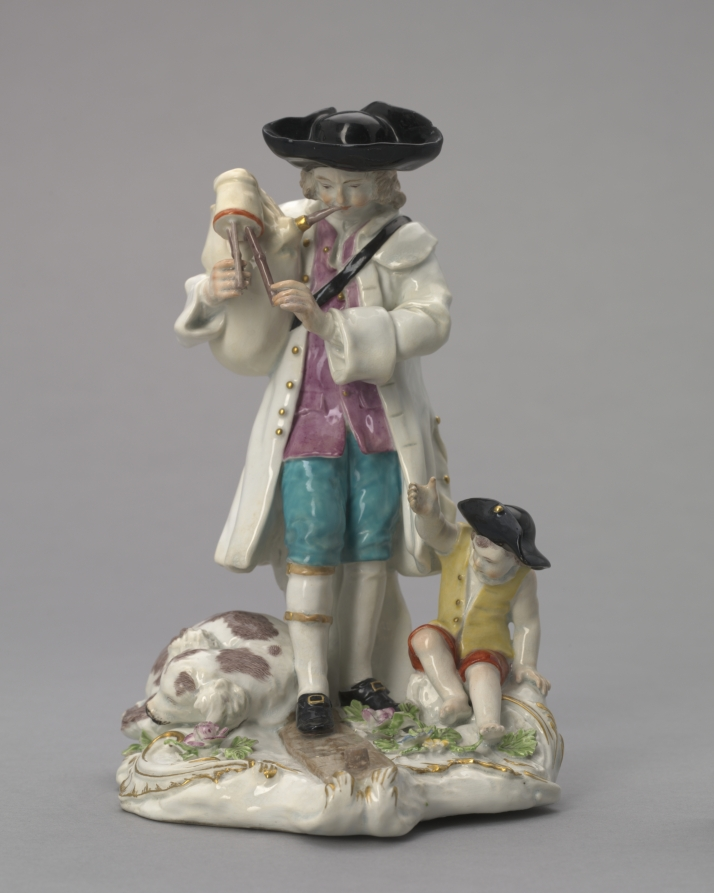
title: The Itinerant Musician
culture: England, Chelsea, 18th century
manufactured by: Chelsea Porcelain Factory (Britain, London, 1745–84)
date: c. 1756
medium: soft-paste porcelain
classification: Ceramic